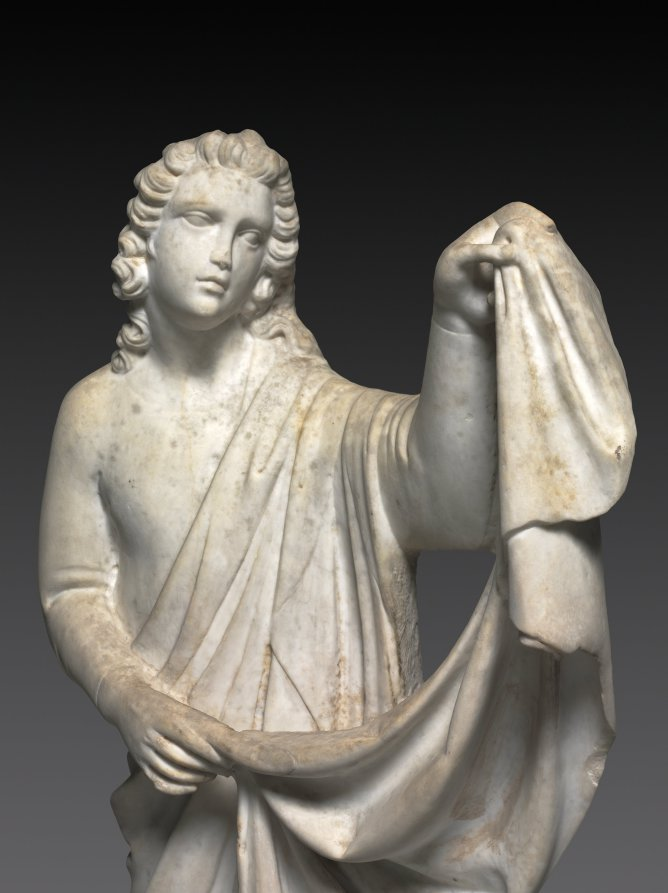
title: Angel from a Tomb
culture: Italy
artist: workshop of Tino di Camaino (Italian, c. 1285–1337)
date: 1330–50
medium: marble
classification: Sculpture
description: Tino da Camaino was active in Siena, Pisa, and Florence after 1311 where he established his reputation as an important and gifted sculptor. In 1323 he was summoned to the Angevin court at Naples, probably by King Robert of Anjou to work on the sepulchral monument of the king's daughter-in-law, Catherine of Austria. During the remainder of his life, Tino created a remarkable series of tomb sculptures in Naples. This pair of marble angels most likely represents the work of a member of Tino's workshop produced for one of these Neapolitan tombs, either during the final years of the master's life, or else independently after Tino's death in 1337.